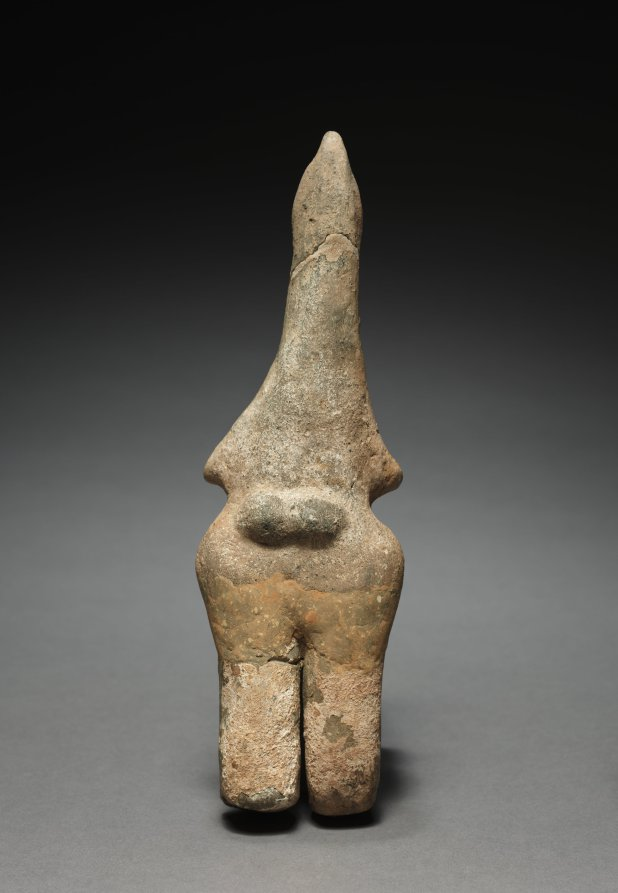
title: Figurine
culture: Iran, Amlash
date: 800s BCE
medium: terracotta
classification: Sculpture